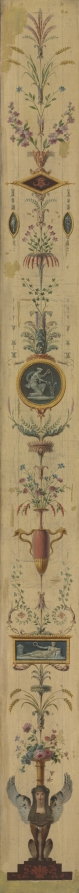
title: Decorative Panel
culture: France, 18th century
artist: Pierre Rousseau (French, 1751–1829)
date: 1790s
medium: oil on canvas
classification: Painting